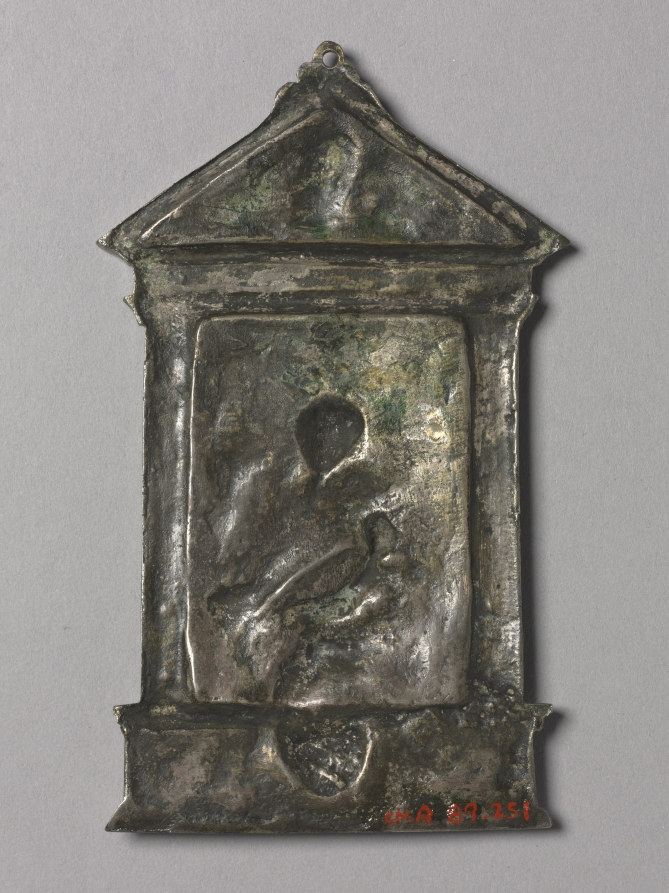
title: Pax with the Madonna and Child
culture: Italy, 16th century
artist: Moderno (Italian, 1467–1528)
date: after 1506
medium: silver and gilt silver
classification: Sculpture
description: A pax is a small flat tablet decorated with Christian images and meant to be kissed by the priest before Communion. The Madonna, crowned with a halo, sits with the Christ child on her right knee, and her drapery falls delicately off her right shoulder as she exposes her breast to the Christ child. Christ's posture is characteristic of an infant, and his body turns out as he clasps onto his mother's drapery while his head faces inward. In the background, Saint Joseph holds a cross. Two angels, each with a wreath, float in the distance above the Madonna's head while on each side of the Madonna, the heads of five male saints are represented, carved in low relief. Some saints focus on the holy family, while others look upward to heaven. Saint Joseph is cast in higher relief, while the Madonna and Child stand in the highest relief. The pax is in the shape of an architectural structure. Above the pediment, the pax's hanging hole is supported by two concave tear shapes on either side of it. The bottom border is decorated with palmettes, and in the center, a shield bears the Medici coat of arms. Within the structure's pediment, God the Father outstretches his arms. A cherub floats to God's right and the two gaze down upon the holy family and saints.